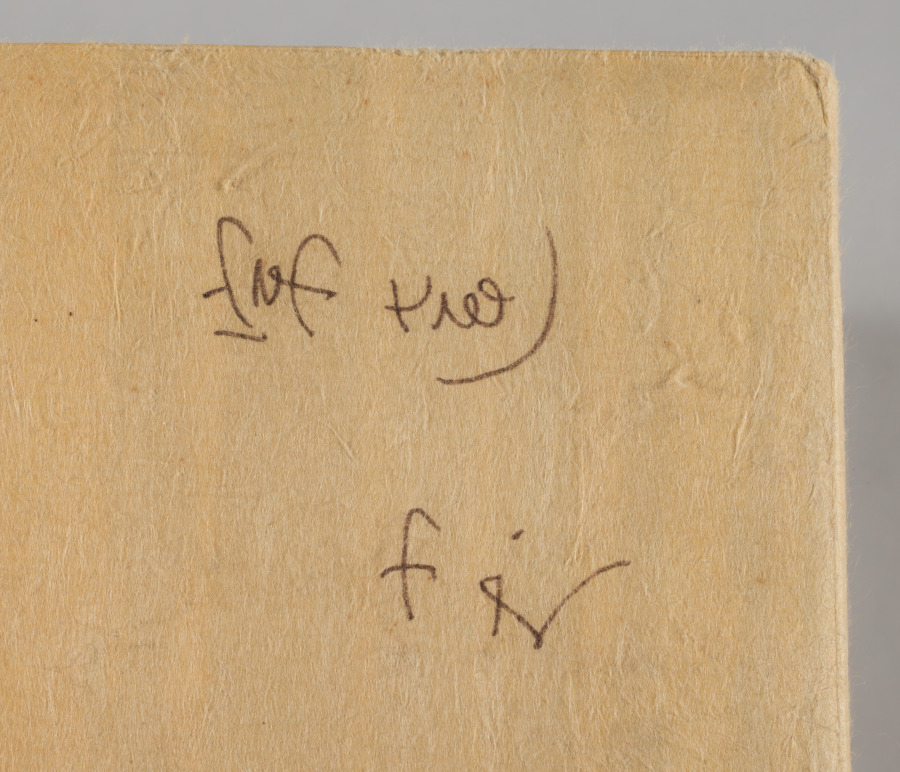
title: Puppy with Dandelions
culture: Japan, Edo period (1615–1868)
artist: studio of Tawaraya Sōtatsu (Japanese, c. 1570–c. 1640)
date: 1600–1640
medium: hanging scroll; ink on paper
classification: Painting